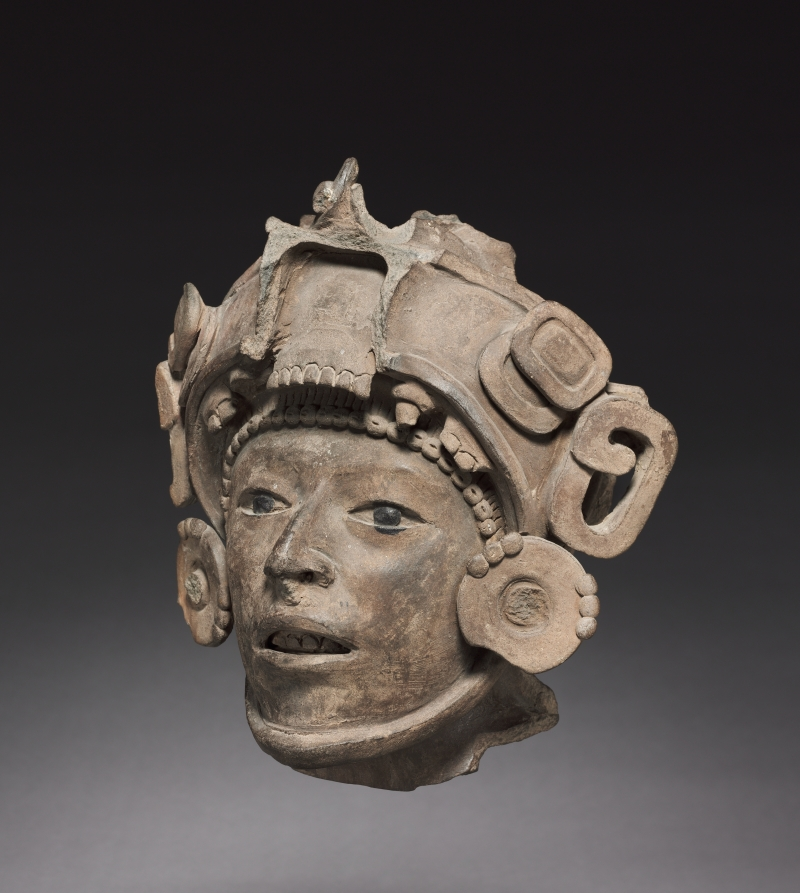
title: Head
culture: Mexico, Classic Veracruz, 7th-10th Century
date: c. 600–900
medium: earthenware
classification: Sculpture